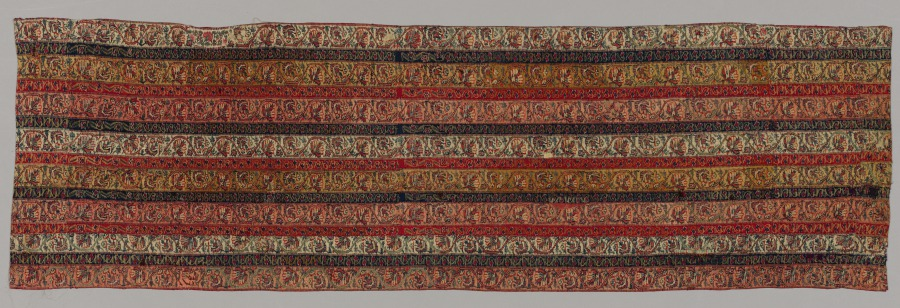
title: Fragment: Back of a Coat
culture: India, Kashmir, 19th century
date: after 1830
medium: twill weave, brocaded; wool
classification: Textile